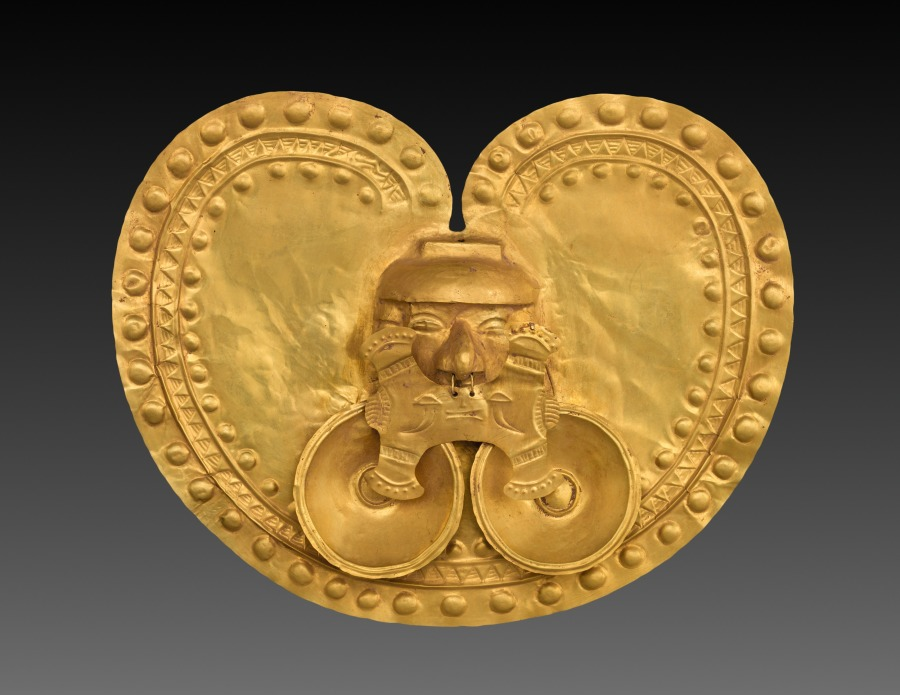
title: Pectoral (Chest Ornament)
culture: Isthmian Region (Colombia), Calima, Yotoco period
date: 1–800 CE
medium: gold, hammered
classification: Metalwork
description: Bilobed pectorals are some of the most flamboyant objects created by artists in Colombia’s Calima region. Chiefs apparently wore such pectorals—among the largest torso adornments ever created in the ancient Americas—with other gold objects, including bracelets, dramatic headdress adornments, and ear and nose ornaments like those shown on the pectoral itself. Thus, they armored themselves in gold, which likely had complex symbolism; for instance, it may have been associated with the sun and thereby with nourishing cosmic energies and positive moral behavior.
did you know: Calima bilobed pectorals are among the largest torso ornaments ever made in the ancient Americas.